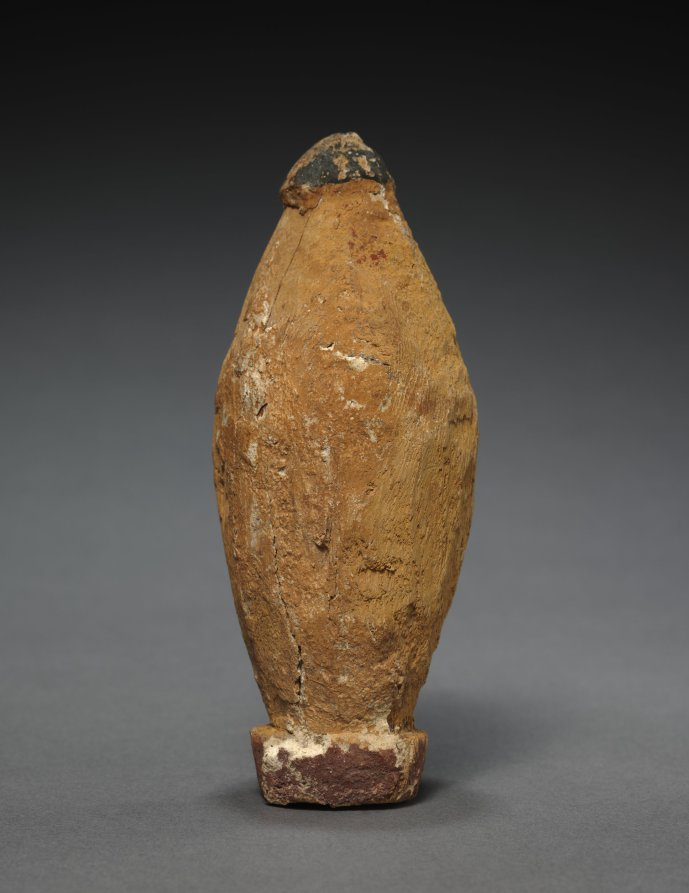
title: Model Storage Vessel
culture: Egypt, Middle Kingdom (2040–1648 BCE), Dynasties 11–12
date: c. 2000–1900 BCE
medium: painted wood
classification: Funerary Equipment